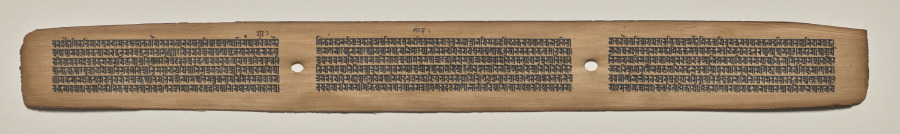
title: Text, folio 44 (recto), from a Manuscript of the Perfection of Wisdom in Eight Thousand Lines (Ashtasahasrika Prajnaparamita-sutra)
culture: Eastern India, Bihar, Vikramashila Monastery. Painting: Nepal, Kathmandu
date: Sunday, September 14, 1119 (year 239 of the Newar Samvat in the month of Ashvina)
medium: gum tempera and ink on palm leaves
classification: Painting